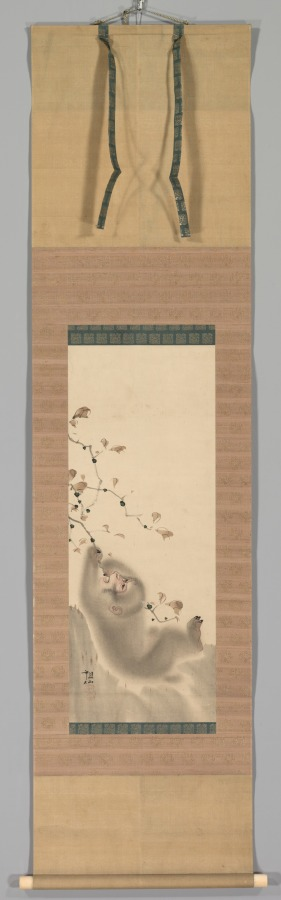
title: Monkey Hanging on to a Branch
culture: Japan, Edo period (1615–1868)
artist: Mori Sosen (Japanese, 1747–1821)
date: 1780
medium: hanging scroll; color on paper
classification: Painting